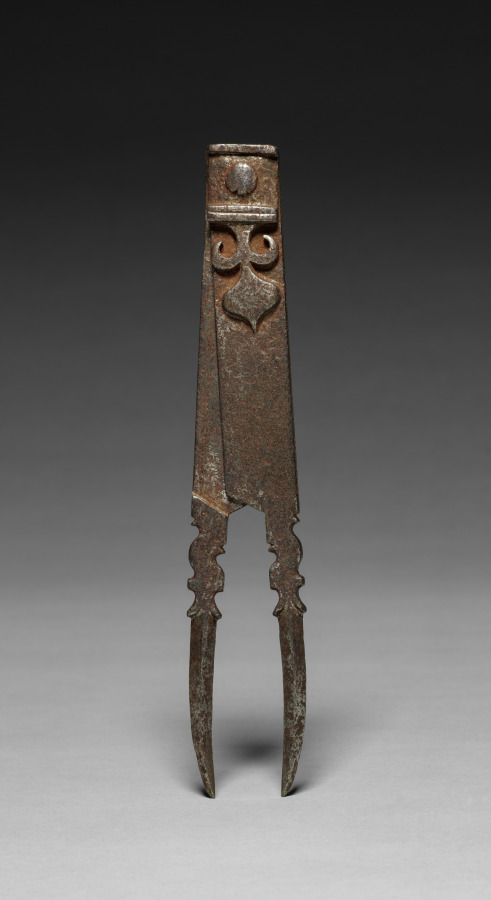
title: Dividers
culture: France, 16th century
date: 1500s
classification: Tool